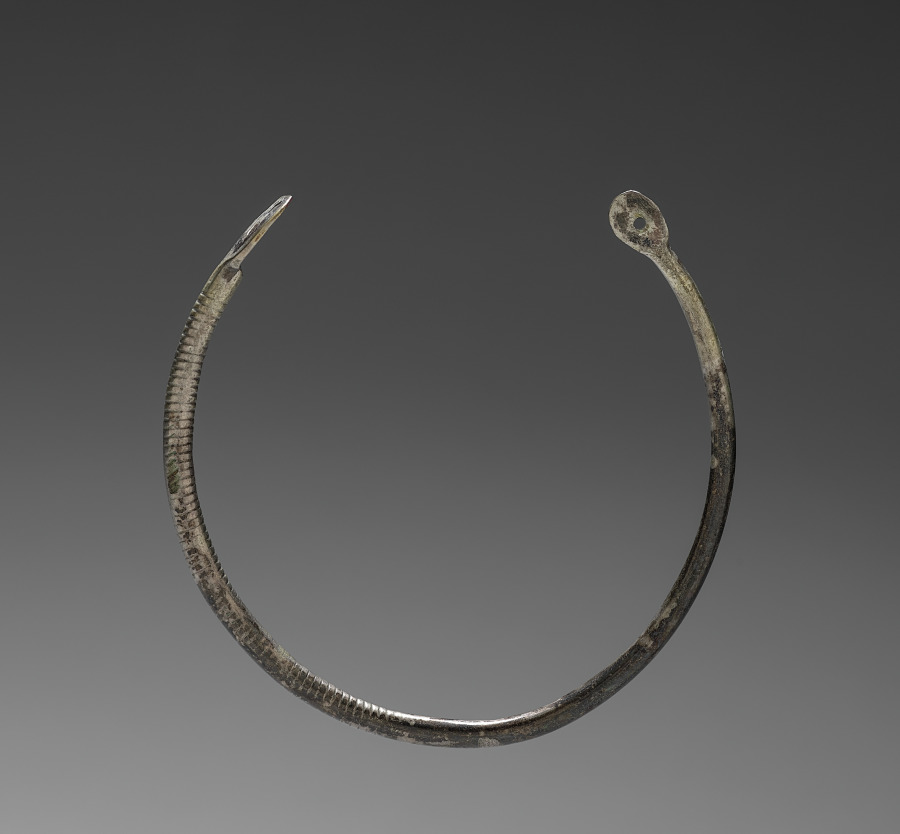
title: Nose Ring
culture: Indo-Chinese, made in France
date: 20th Century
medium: silver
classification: Jewelry